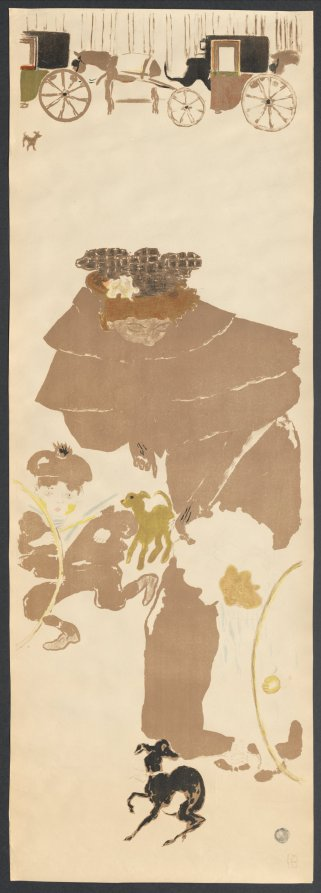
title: Nursemaids’ Promenade, Frieze of Carriages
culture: France, 19th century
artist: Pierre Bonnard (French, 1867–1947)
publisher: Molines, Galeries Lafayette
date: 1895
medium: color lithograph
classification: Print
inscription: The third panel signed with the artist's monogram in the stone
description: This charming scene of a nanny and her three charges extends across four panels meant to be mounted as a folding screen. Pierre Bonnard emulated the solidly colored flat forms of Japanese color woodcut prints, which he collected. He featured the screen in his first solo exhibition at Paris's prestigious Galeries Durand-Ruel in 1896.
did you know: Although this screen was issued in an edition of 110, only about 20 copies survive today.